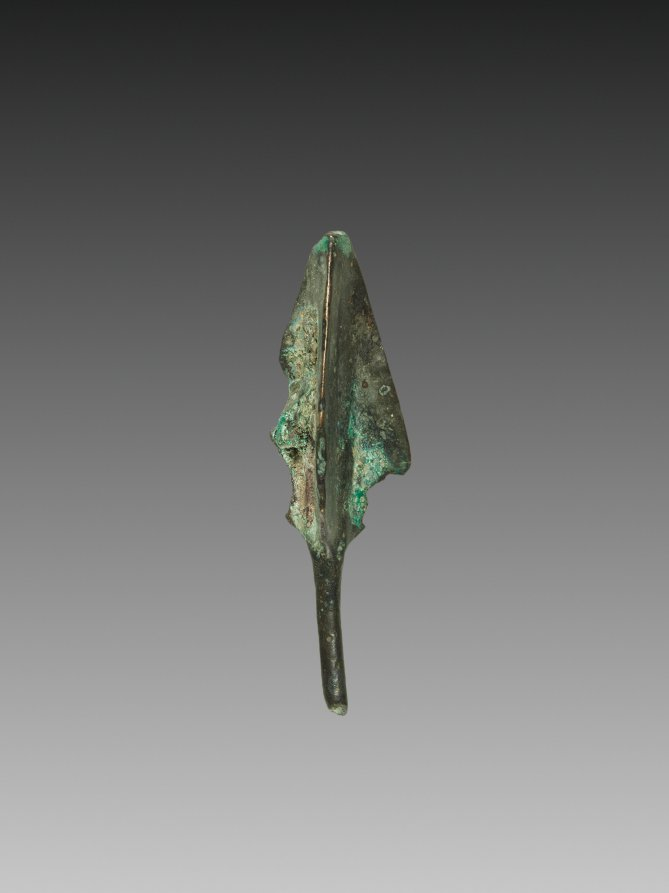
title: Arrow Point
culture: Iran, Ecbatana (?)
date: 550–330 BCE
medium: bronze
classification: Metalwork